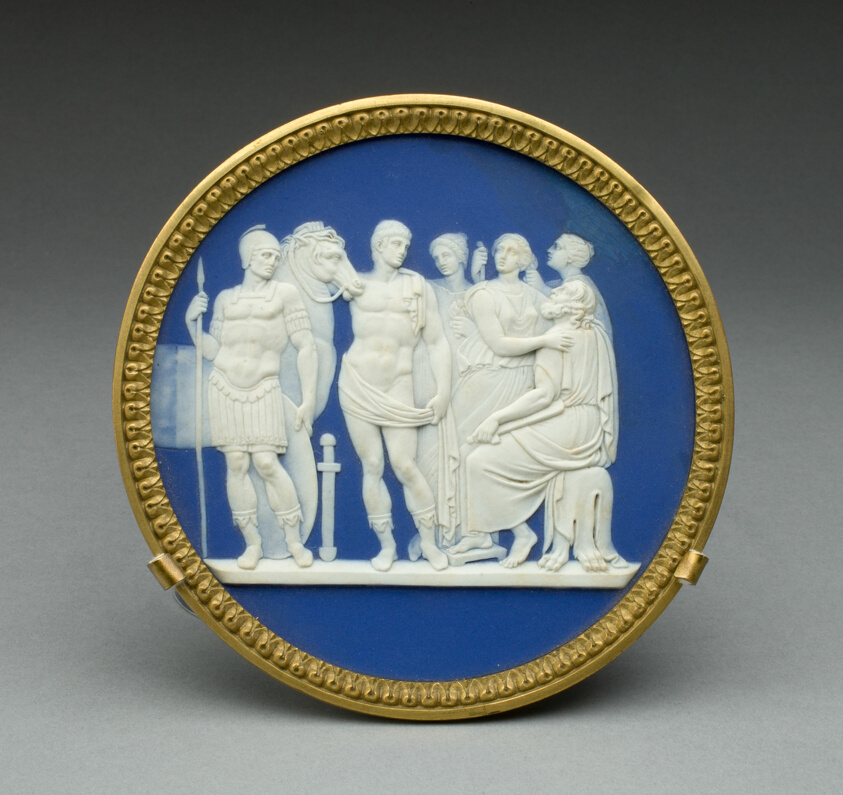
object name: Ceramics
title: Plaque with Priam and Achilles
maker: Wedgwood Manufactory (England, founded 1759)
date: c. 1790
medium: Stoneware (jasperware)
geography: Burslem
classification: sculpture; stoneware; european decorative arts; ceramics